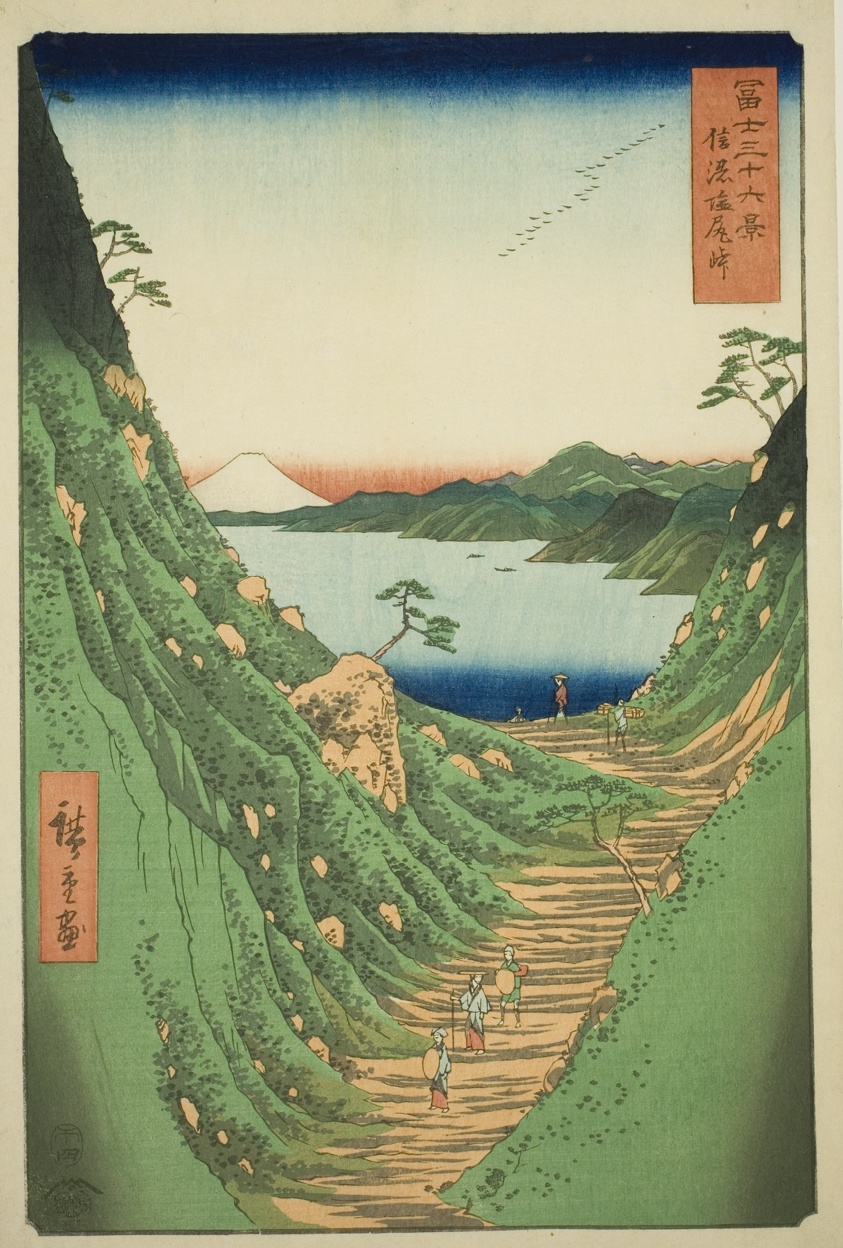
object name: Print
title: Shiojiri Pass in Shinano Province (Shinano Shiojiri toge) , from the series "Thirty-six Views of Mount Fuji (Fuji sanjurokkei)"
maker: Utagawa Hiroshige 歌川 広重; Japanese, 1797-1858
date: 1858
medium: Color woodblock print; oban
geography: Japan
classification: woodblock print; print; asian art